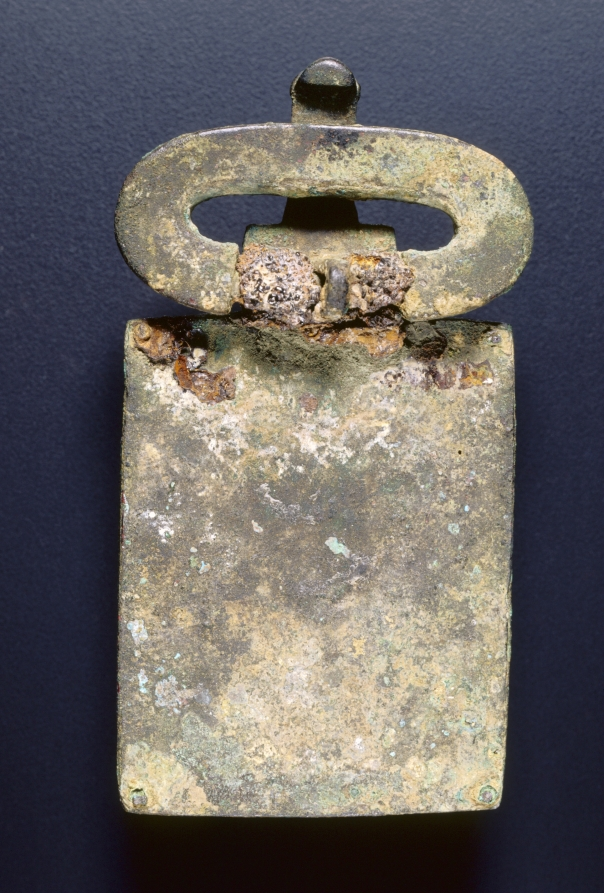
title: Belt Buckle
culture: Visigothic, Spain, Migration Period, 6th century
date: c. 525–560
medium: bronze with garnets, glass, mother of pearl, gold foil, traces of gilding; bronze and glass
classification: Jewelry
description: The art of the European Migration Period (3rd-7th centuries AD) is almost exclusively one of personal adornment-a portable art that followed men and women to their graves. Belt buckles with large rectangular attachment plates have been discovered in cemeteries across the Iberian Peninsula-now occupied by Spain and Portugal-from the period of Visigothic occupation (about AD 412-711). Their decoration varies. Finer examples, like this one, are distinguished by brilliantly inlaid semi-precious stones and colored glass. Garnets were especially prized in Visigothic society for use in cloisonné jewelry. The technique involved the fitting of carefully cut pieces of polished garnet into an intricate grid of compartments, or cloisons. This buckle is so densely inlaid with garnets that it presents a virtual "carpet" of red to the eye. These large Visigothic buckles are strikingly uniform in shape yet endlessly varied in surface design, perhaps a sign that they expressed the personal identities of their original owners. Grave excavations have shown that belt buckles of this type were made for women.